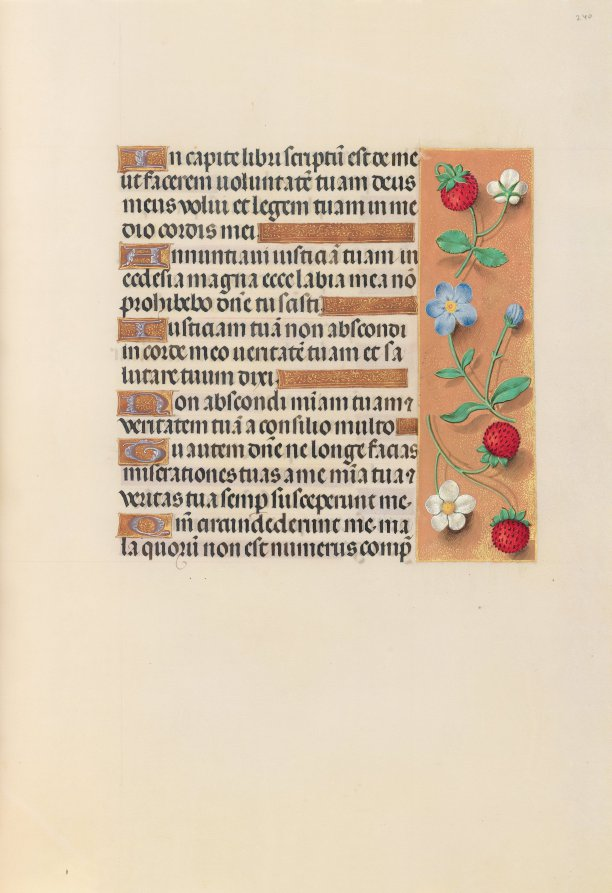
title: Hours of Queen Isabella the Catholic, Queen of Spain: Fol. 240r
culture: Flanders, Ghent and Bruges, late 15th century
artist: Master of the First Prayerbook of Maximillian (Flemish, c. 1444–1519)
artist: and Associates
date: c. 1500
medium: ink, tempera, and gold on vellum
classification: Bound Volume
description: This manuscript was illuminated by a circle of at least five highly organized manuscript painters active in the Flemish cities of Ghent and Bruges. The principal illuminator was Alexander Bening, who painted the majority of the book's miniatures. Manuscripts produced by this circle of artists are renowned for the decoration of their borders, which typically feature a rich variety of realistically-painted flowers, birds, and butterflies. This prayer book, called a book of hours, was intended not for a cleric, but for the private devotions of a lay person-in this case, Isabella the Catholic, Queen of Spain (1451-1504). Isabella's coat of arms embellishes the book's frontispiece. It is unlikely that the book was commissioned by the Queen herself; rather, she probably received it as a diplomatic gift from someone courting her patronage, perhaps Cardinal Francisco Jimenez de Cisneros. A Franciscan friar, Jimenez was dependent upon Isabella for his advancement, first to the post of Queen's confessor in 1492, and then to Archbishop of Toledo in 1495.